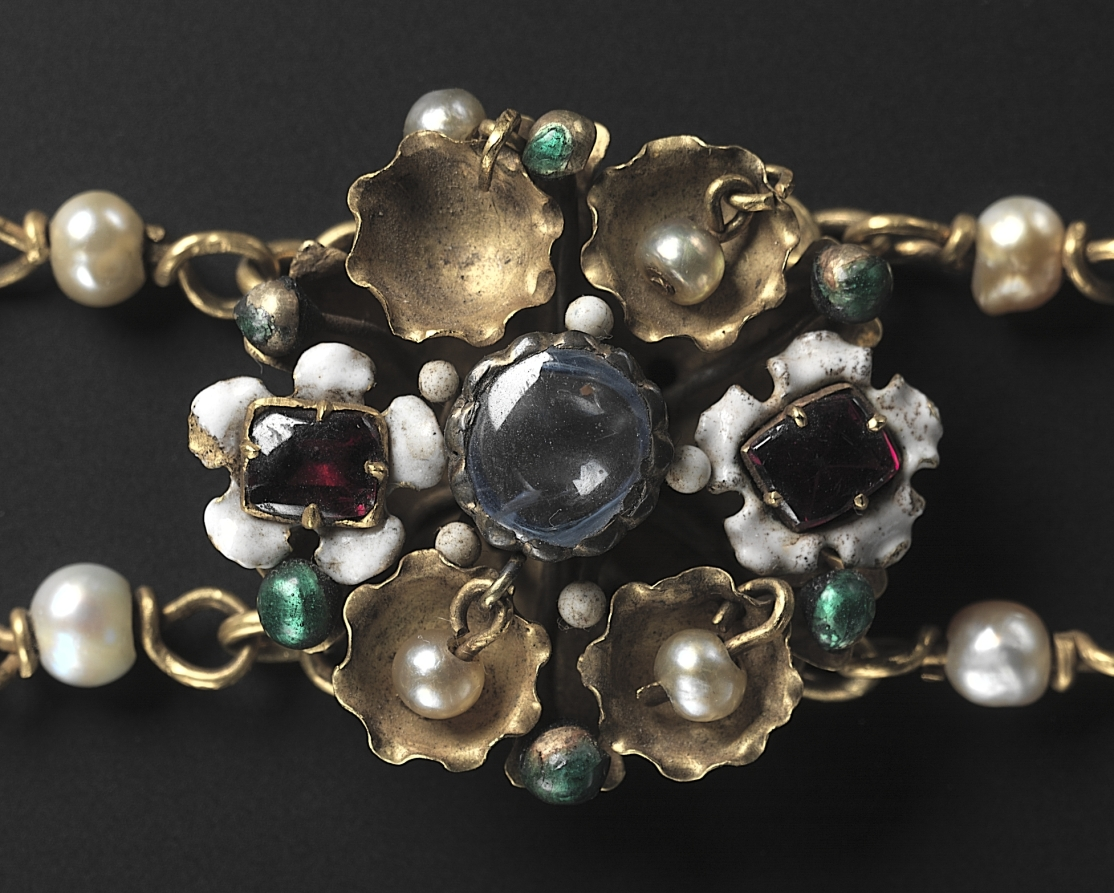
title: Twelve Medallions Mounted as a Necklace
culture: France, Paris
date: c. 1400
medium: enameled gold, precious stones, and pearls; some later additions with modern chain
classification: Jewelry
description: These medallions, which have loops on the backs, must have originally been sewn onto a garment or, more likely, a woman’s headpiece. In spite of the modern chain to which they are now attached, the medallions are unique items of feminine apparel from around 1400. Such items would have been well known at the courts of the Valois in Paris, Bourges, and Dijon. The central medallion with a “white lady” is enameled “in the round”––a new Parisian technique for enameling irregular or three-dimensional surfaces. Such white lady medallions are described in inventories of the period